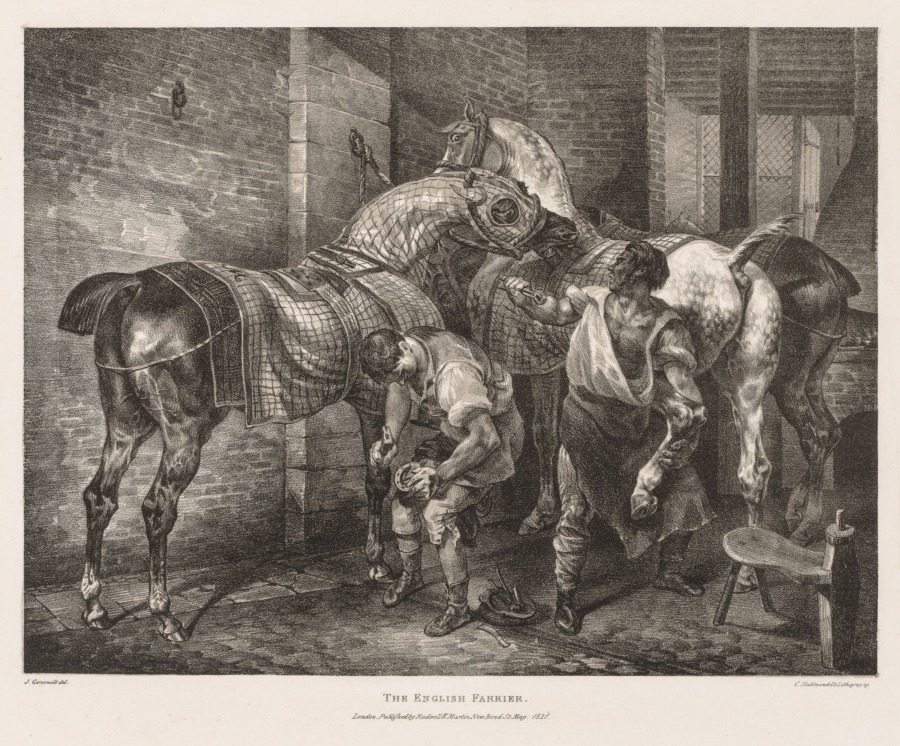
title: Various Subjects Drawn from Life and on Stone: The English Farrier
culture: France, 19th century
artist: Théodore Géricault (French, 1791–1824)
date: 1821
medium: color lithograph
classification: Print